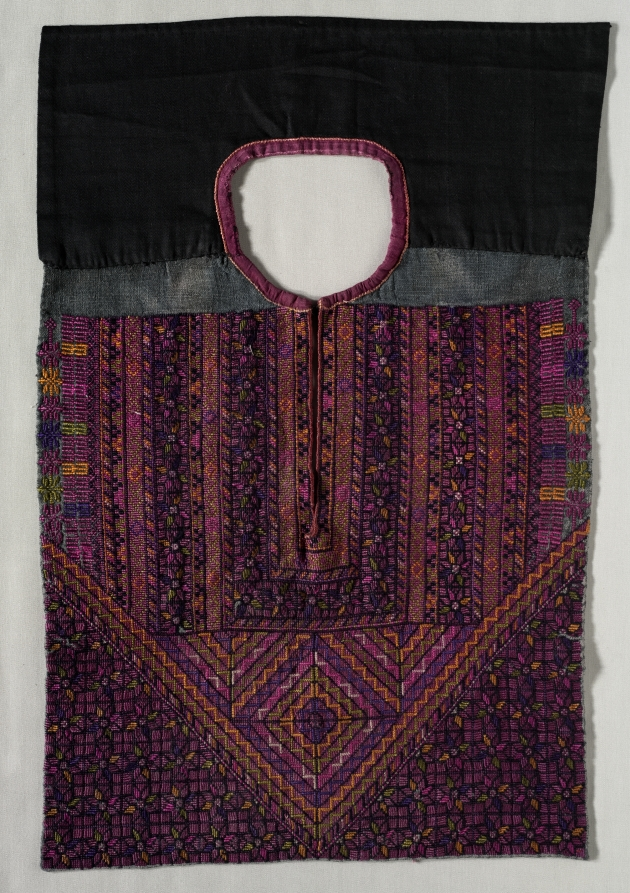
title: Embroidered Blouse Front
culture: Palestine, 19th century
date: 19th century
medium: embroidery; silk on linen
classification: Embroidery